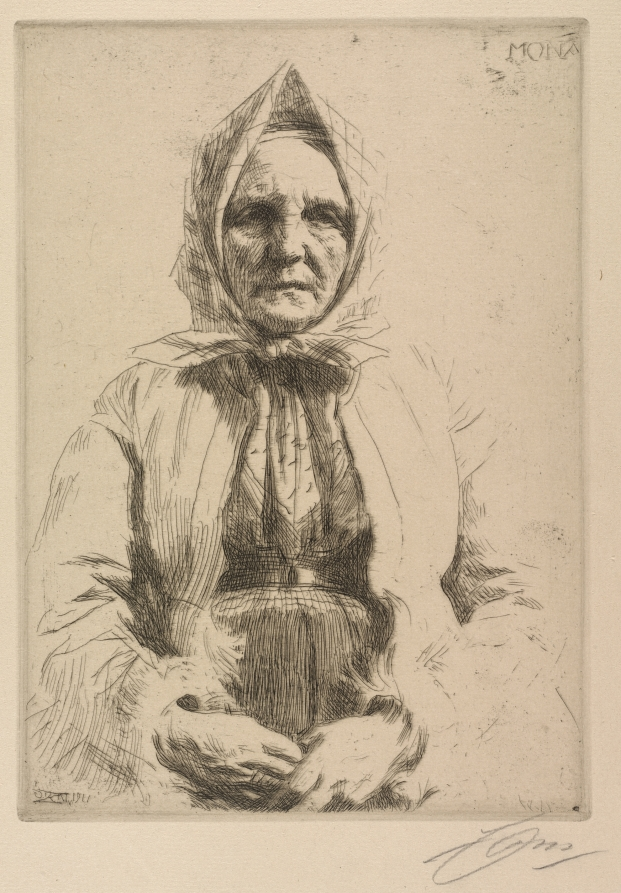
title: Mona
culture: Sweden, 20th century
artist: Anders Zorn (Swedish, 1860–1920)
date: 1911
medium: etching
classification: Print